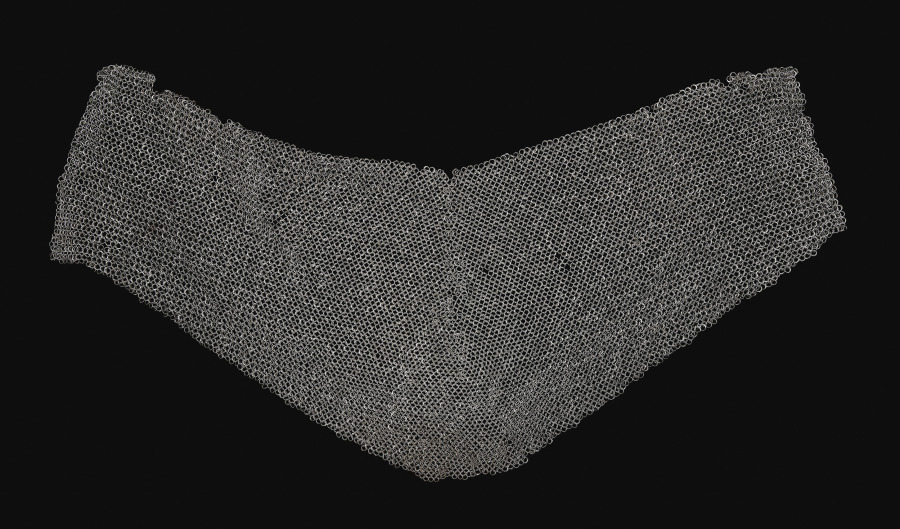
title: Cape of Mail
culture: Europe, 16th century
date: 1500s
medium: steel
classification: Arms and Armor